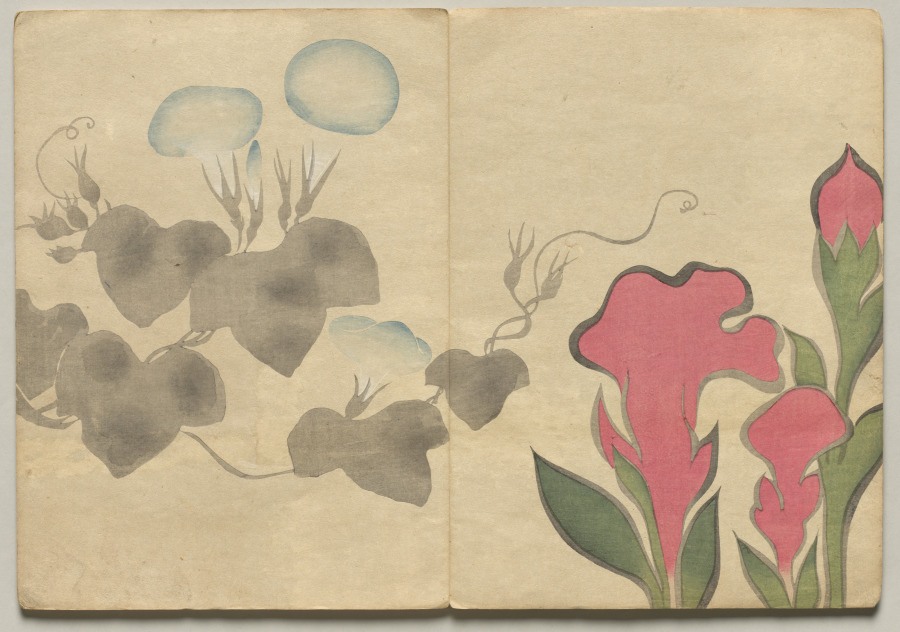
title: Scene from The Kōrin Picture Book (Volume 1)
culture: Japan, Edo period (1615–1868)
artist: Nakamura Hōchū (Japanese, d. 1819)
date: 1800s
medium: color woodblock printed book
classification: Bound Volume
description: Ogata Korin (1658-1716) was one of the most admired artists of Rimpa, or "decorative school painting." These books by the charming later-generation Rimpa artist Hochu record Korin's inventive designs.